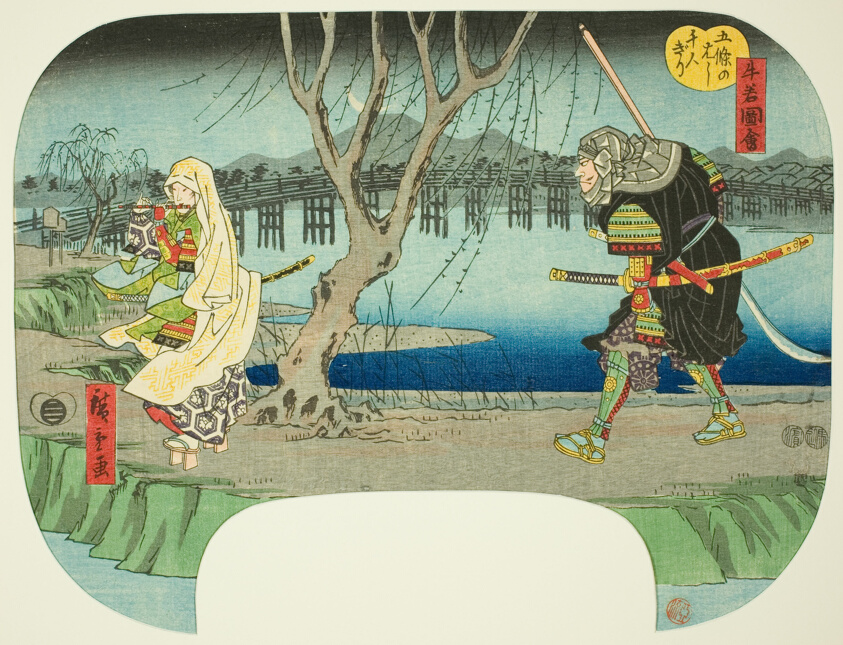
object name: Print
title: Killing One Thousand People at Gojo Bridge (Gojo no hashi sennin kiri), from the series "Scenes from the Life of Yoshitsune (Ushiwaka zue)"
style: Japanese (culture or style)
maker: Utagawa Hiroshige 歌川 広重; Japanese, 1797-1858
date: c. 1849/52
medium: Color woodblock print; uchiwa-e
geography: Japan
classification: woodblock print; print; asian art